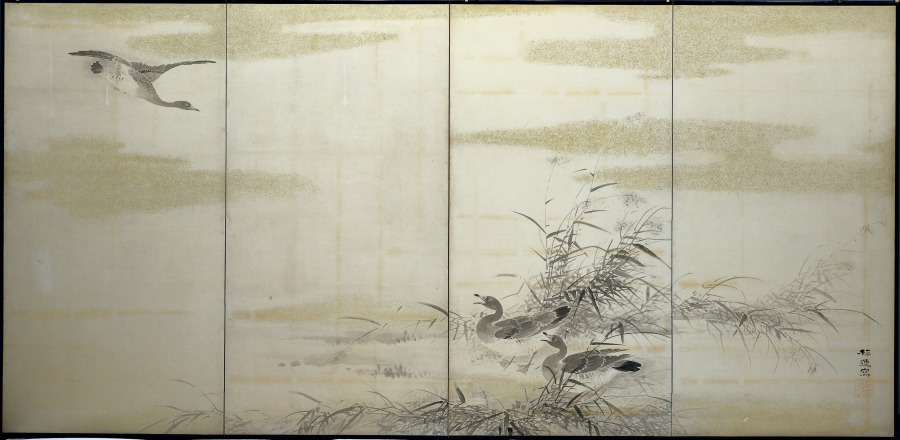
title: Geese, Reeds, and Water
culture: Japan, Edo period (1615–1868)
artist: Yamamoto Baiitsu (Japanese, 1783–1856)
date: 1800s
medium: Pair of four-panel folding screens; ink, color, and cut gold foil on paper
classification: Painting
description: This byōbu composition differs from most in that it comprises two four-panel screens, rather than two six-panel units. Since the current mounting is modern, it is impossible to determine whether its present configuration represents its original design. Some panels may have been removed to help the screens better fit into a modern interior space. Baiitsu worked almost exclusively in monochromatic ink tones and favored classical Chinese painting themes.